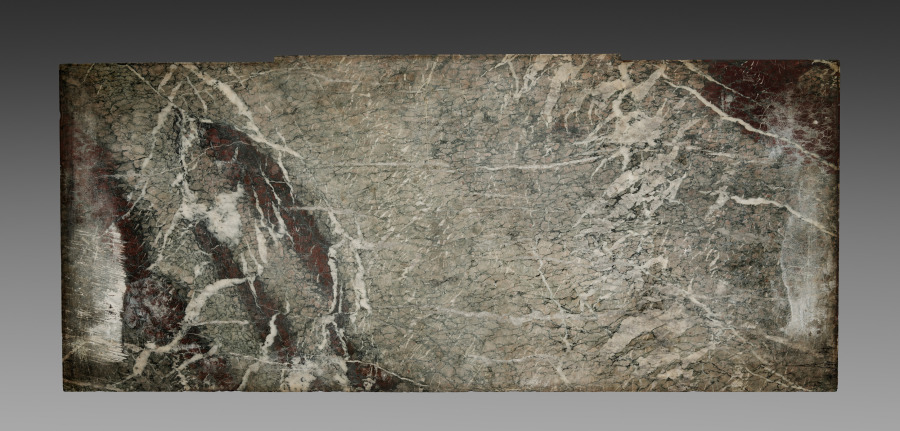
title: Marble Top for Cabinet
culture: France, late 17th Century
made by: André-Charles Boulle (French, 1642–1732)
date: c. 1690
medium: ebony, marquetry in metal and tortoiseshell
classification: Furniture and woodwork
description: Appointed cabinetmaker to King Louis XIV in 1672, André-Charles Boulle became a master of furniture making in France during the late 1600s until his death in 1732. Known primarily for his use of marquetry, in which metal patterns are inlaid into tortoiseshell then applied within the veneered surface of the furniture, Boulle established a level of quality and craftsmanship few others could achieve. As a result, his work found favor at the royal court and among other aristocrats and diplomats eager to impress the king. The inclusion of a medallion depicting Louis XIV within the bronze decoration of this chest would have identified the owner with the royal court. Often exhibiting stout architectural proportions with elegant groups of inlaid motifs such as the parrot on the central panel of this chest, Boulle’s designs are an example of the intellectual fashion for contrasting ideas, materials, and motifs.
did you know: Originally designed to sit atop an elaborate tall stand, this chest was likely altered in the late 1700s to reduce its scale and height.